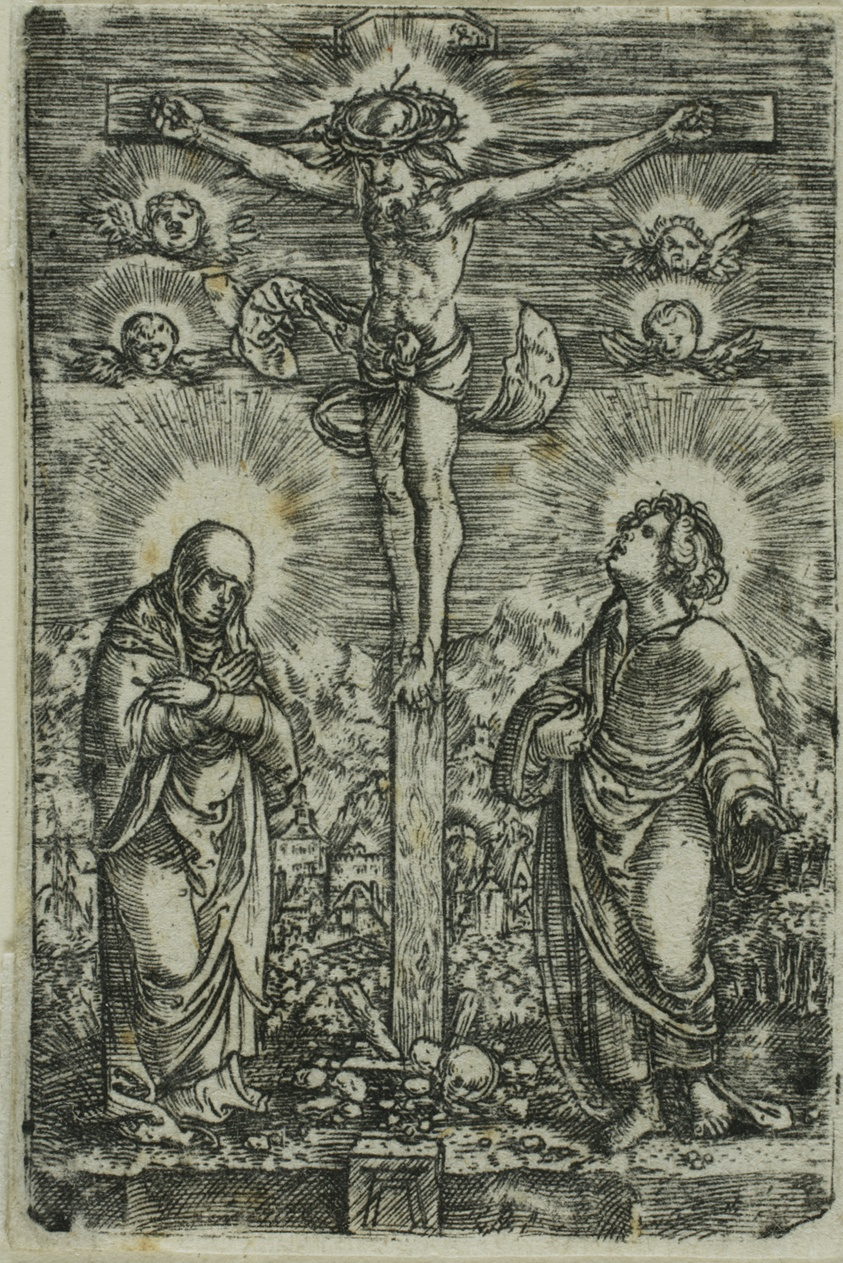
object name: Print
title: Christ on the Cross (The Small Crucifixion)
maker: Albrecht Altdorfer (German, c.1480-1538)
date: 1500/38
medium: Engraving in black on ivory laid paper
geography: Germany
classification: engraving; print; prints and drawing